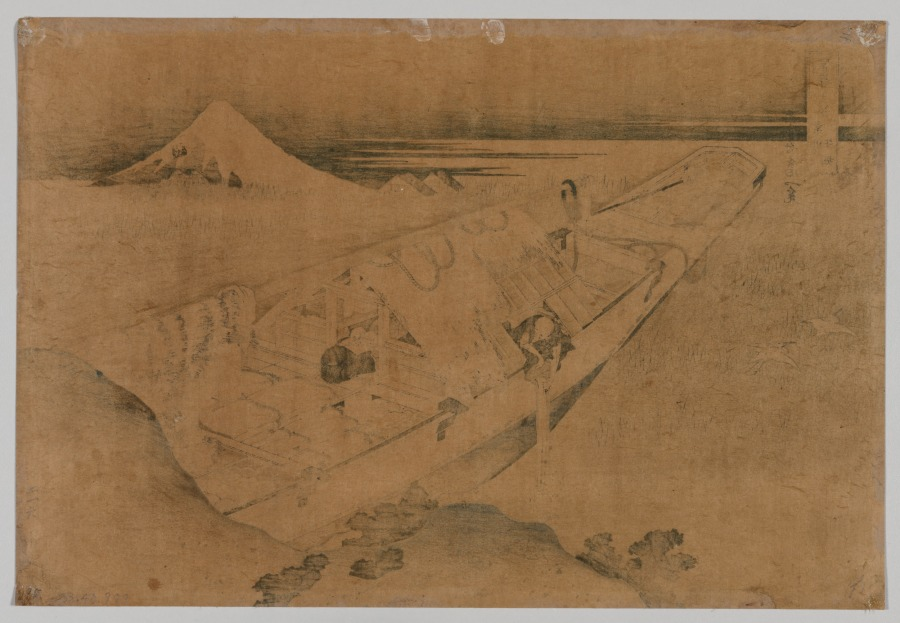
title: Fuji from Ushibori, Province of Hitachi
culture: Japan, Edo period (1615–1868)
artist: Katsushika Hokusai (Japanese, 1760–1849)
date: 1760–1849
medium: color woodblock print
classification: Print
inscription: Signature: Zen Hokusai I-itsu fude